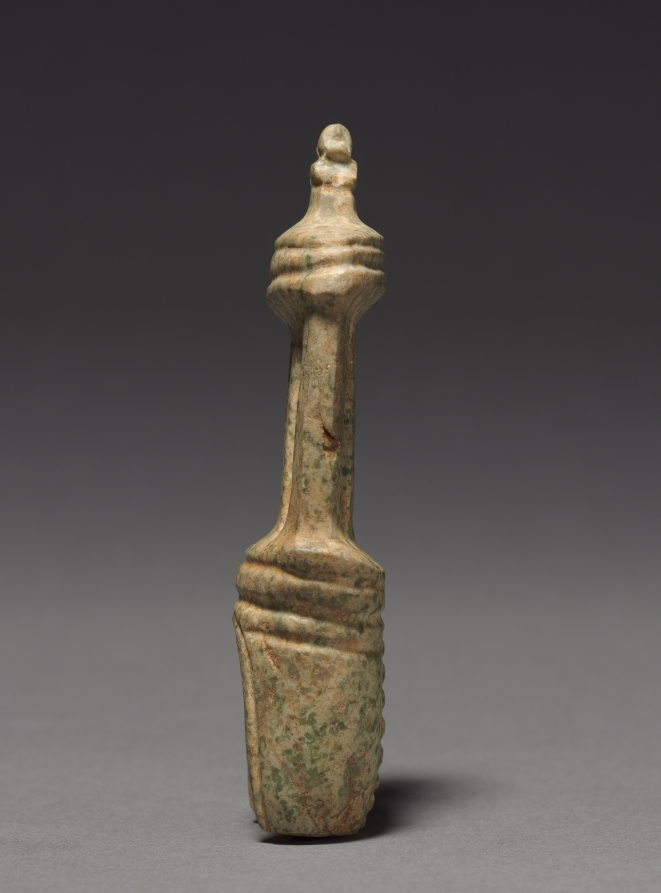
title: Architectural Model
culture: Mesoamerica, Mexico, Guerrero, Mezcala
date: 100 BCE–300 CE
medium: serpentine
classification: Sculpture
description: The Mezcala style takes its name from a river in its homeland, the Guerrero region of western Mexico. The style is known for small-scale stone sculptures including architectural “models” characterized by sleek abstraction. Because comparisons to actual architecture in the Mezcala region are scarce, it is not known whether the models refer to temples, houses, or underground funerary structures.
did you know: Mezcala architectural models reportedly come from burials, but few have been scientifically excavated.